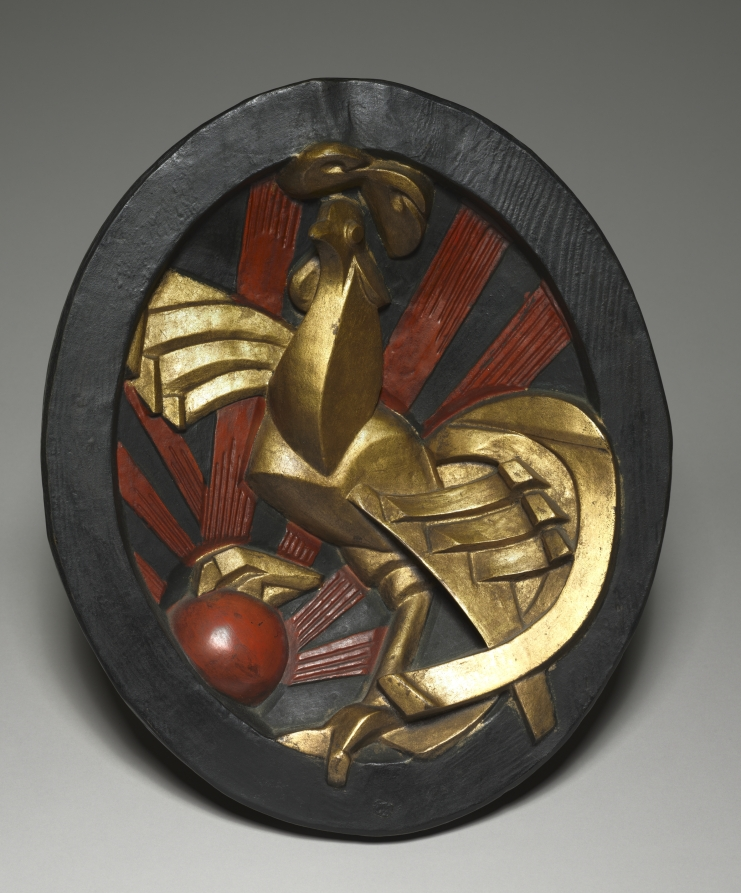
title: Rooster (Gallic Cock)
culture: France, 20th century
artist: Raymond Duchamp-Villon (French, 1876–1918)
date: 1916 (plaster), cast 1919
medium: painted bronze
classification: Sculpture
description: A pioneer of Cubist sculpture, Duchamp-Villon carved the original plaster for this bronze relief while serving in the army during World War I. It was intended for the entrance to a temporary theater erected near the front lines, where French soldiers would have recognized the rooster and rising sun as symbols of victory. Duchamp-Villon died during the war, and in 1919, five bronze casts were made from his plaster as a memorial to the artist.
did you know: Before being embraced by artists, the term "Cubism" originated from an insult. The same is true of Gallus, a Latin word meaning both "rooster" and "inhabitant of Gaul" (present-day France). Once used to mock the French, the rooster was reclaimed as a national symbol of triumph, as pictured here.